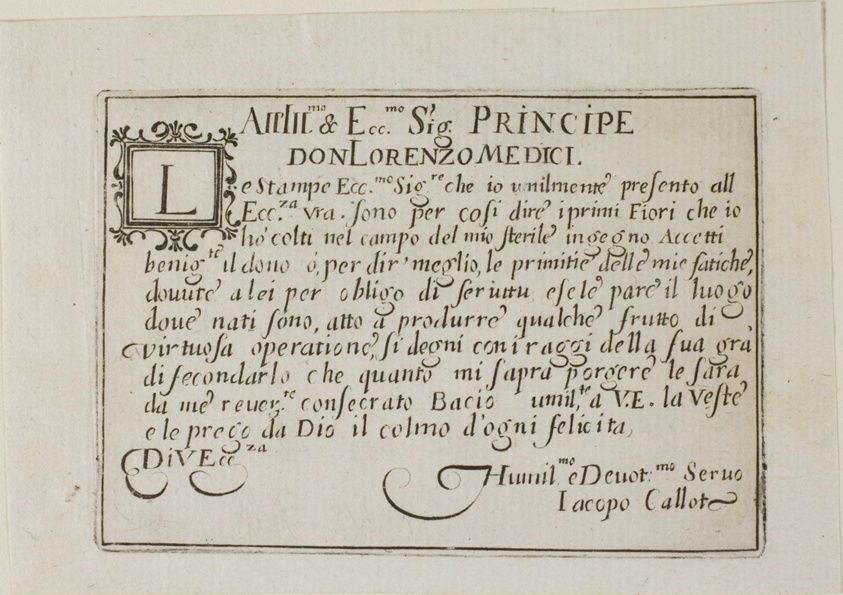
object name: Print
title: Dedication to Don Lorenzo de'Medici, from The Caprices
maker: Jacques Callot (French, 1592-1635)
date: c. 1622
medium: Etching on ivory laid paper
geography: France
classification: etching; print; prints and drawing